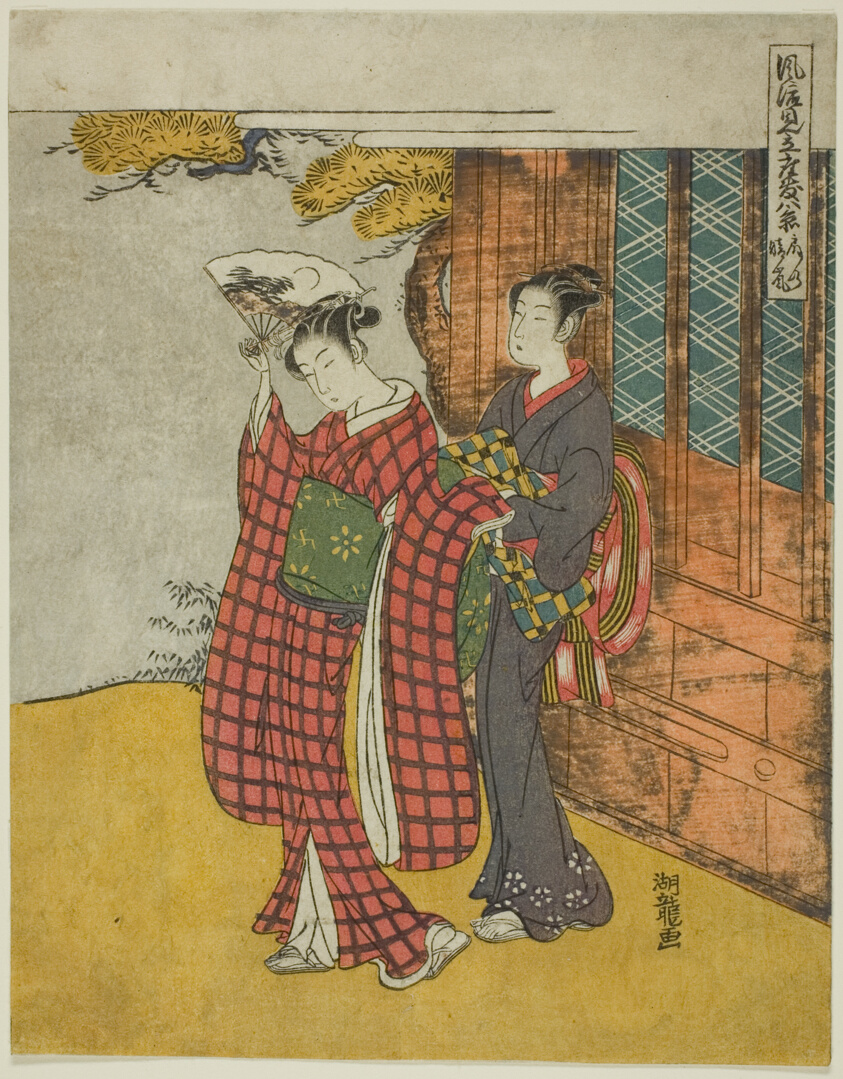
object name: Print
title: Clearing Weather of the Fan (Ogi no seiran), from the series "Fashionable Parodies of the Eight Parlor Views (Furyu mitate zashiki hakkei)"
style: Japanese (culture or style)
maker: Isoda Koryusai (Japanese, 1735-1790)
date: c. 1773/75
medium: Color woodblock print; chuban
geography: Japan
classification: woodblock print; print; asian art